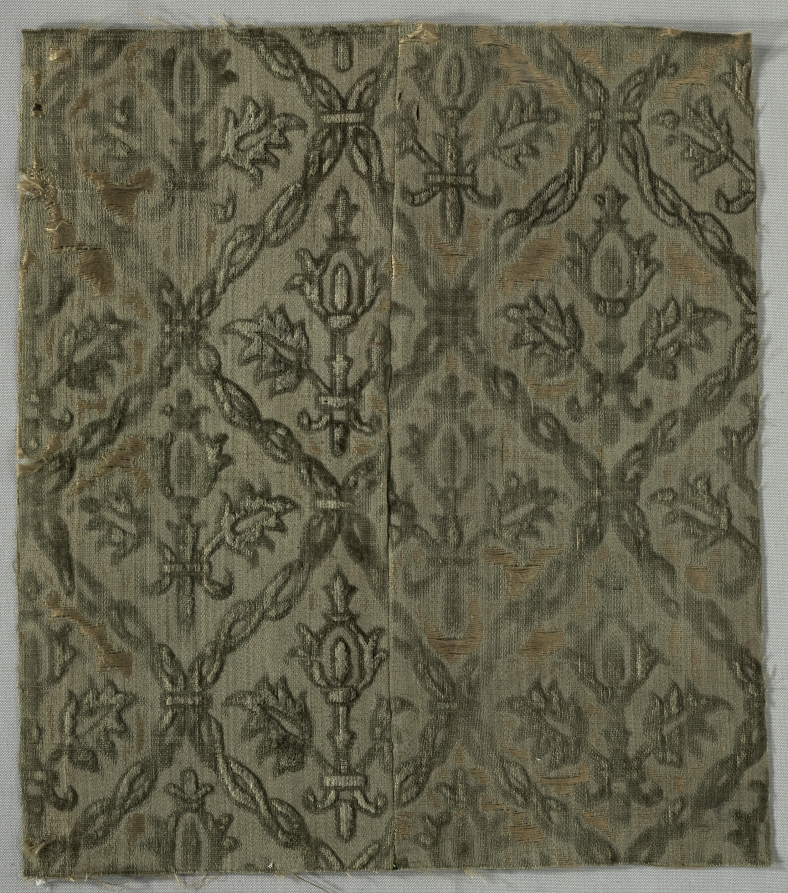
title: Velvet Fragment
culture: Italy, 2nd half 17th century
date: 1650–1699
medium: velvet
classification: Velvet